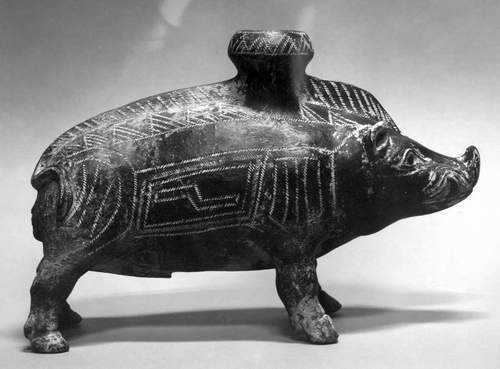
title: Vessel in the Shape of a Wild Boar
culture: Italy, Etruscan or modern forgery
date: 700–500 BCE or 1900s CE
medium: terracotta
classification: Ceramic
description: Wild boars were a favorite motif in classical antiquity, but this vessel has long puzzled scholars. Its brown, burnished surface, with incised geometric decoration, recalls Etruscan impasto pottery from as early as the seventh century BC. The naturalistic shape of the boar, however, resembles terracotta vessels made in the fifth century BC or later. Recent scientific analysis suggests that this vessel may have been made in the 20th century, and our curators and conservators are continuing their research.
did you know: This boar enjoyed brief internet fame, with a series of online memes peaking in 2018.